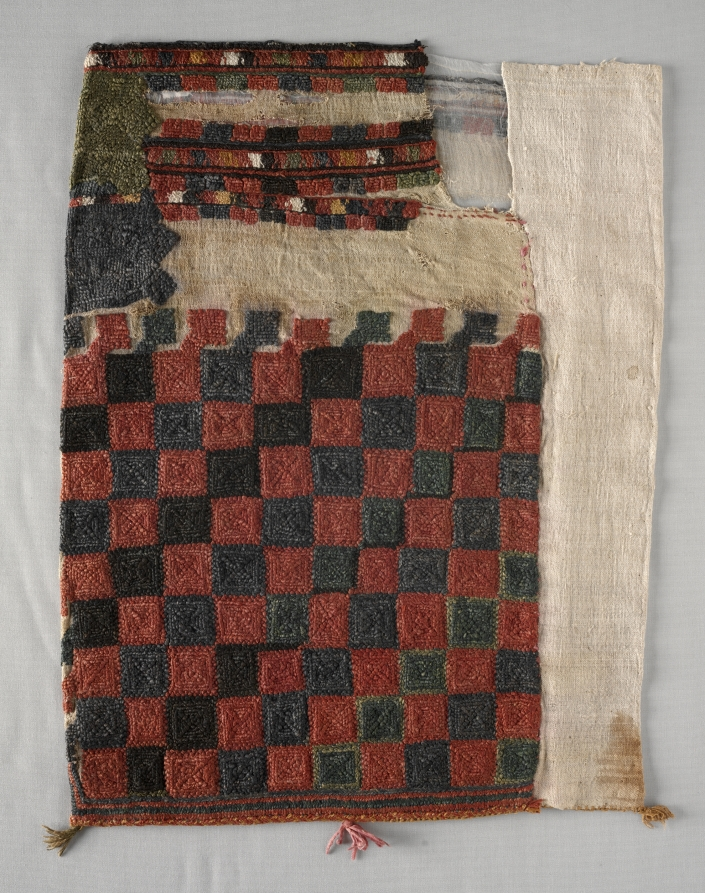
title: Skirt Border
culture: Greece, Dodecanese Islands, Karpathos Island, 17th-18th century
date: 1600s - 1700s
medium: embroidery: silk on linen tabby ground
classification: Embroidery